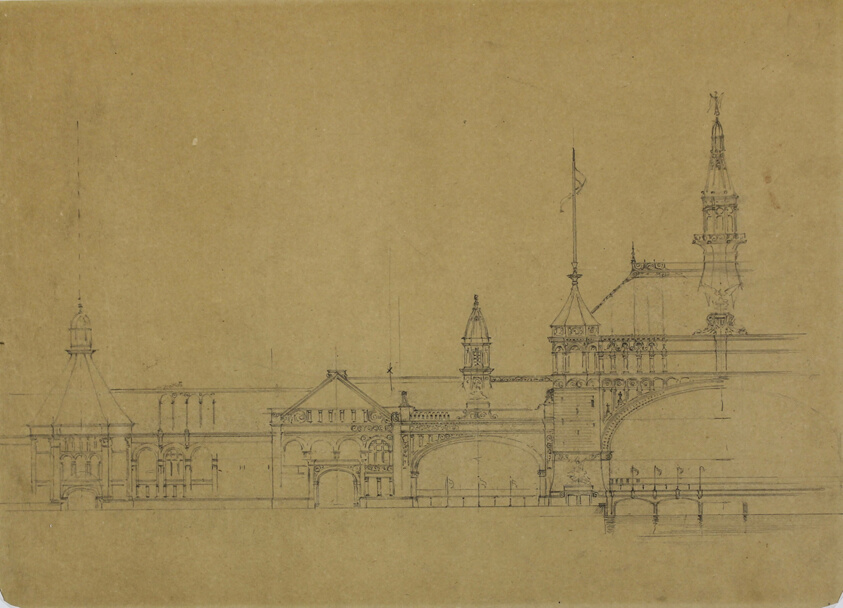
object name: Architectural Drawing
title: World's Columbian Exposition Buildings, Chicago, Illinois, Elevation Sketch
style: 19th century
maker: John Wellborn Root (American, 1850–1891)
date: c. 1890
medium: Pencil on paper mounted on illustration board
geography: United States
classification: architectural drawing; architecture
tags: Chicago, elevations (building divisions), urban planning, world's fairs